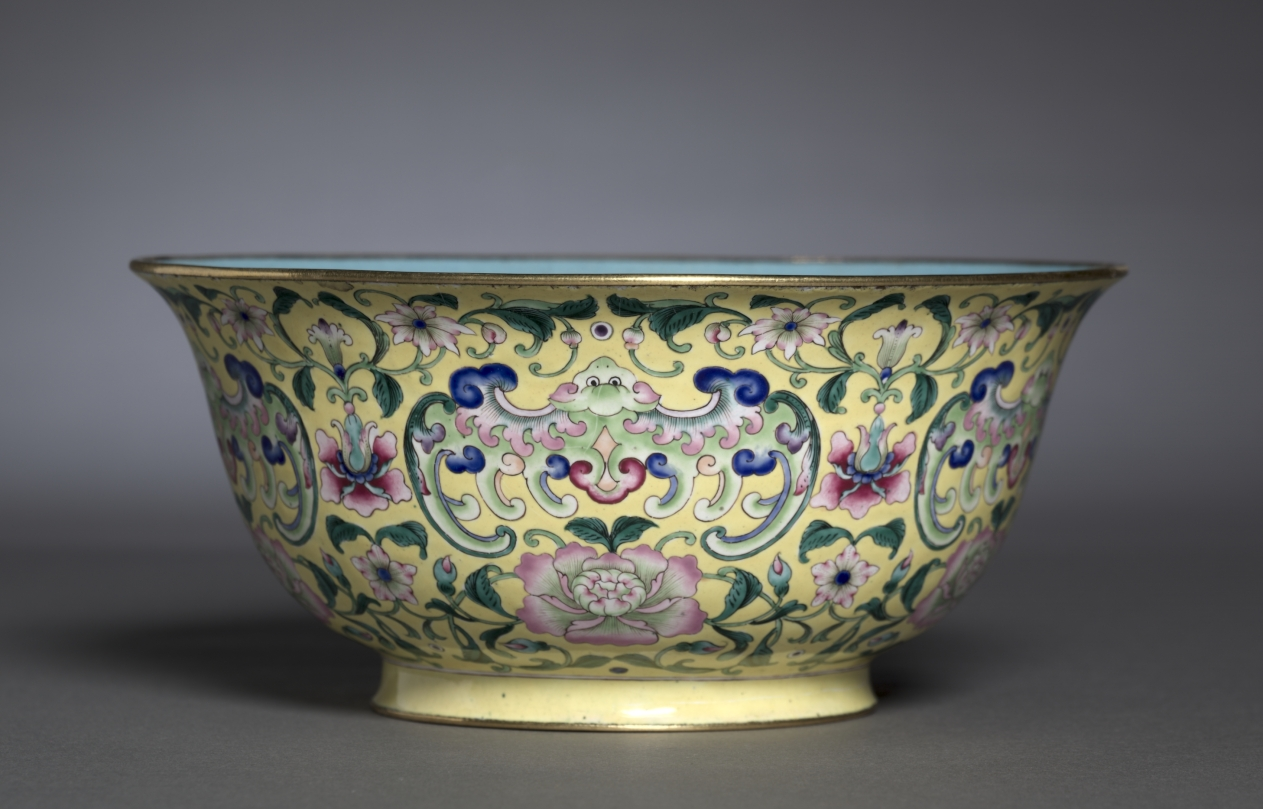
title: Bowl with Bats and Floral Scrolls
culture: China, Qing dynasty (1644–1911), Qianlong reign (1736–95)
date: 1736–95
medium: Canton enamel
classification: Enamel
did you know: The bat is a lucky symbol as the Chinese word for bat, 蝠 fú, is pronounced the same as “good fortune” 福.